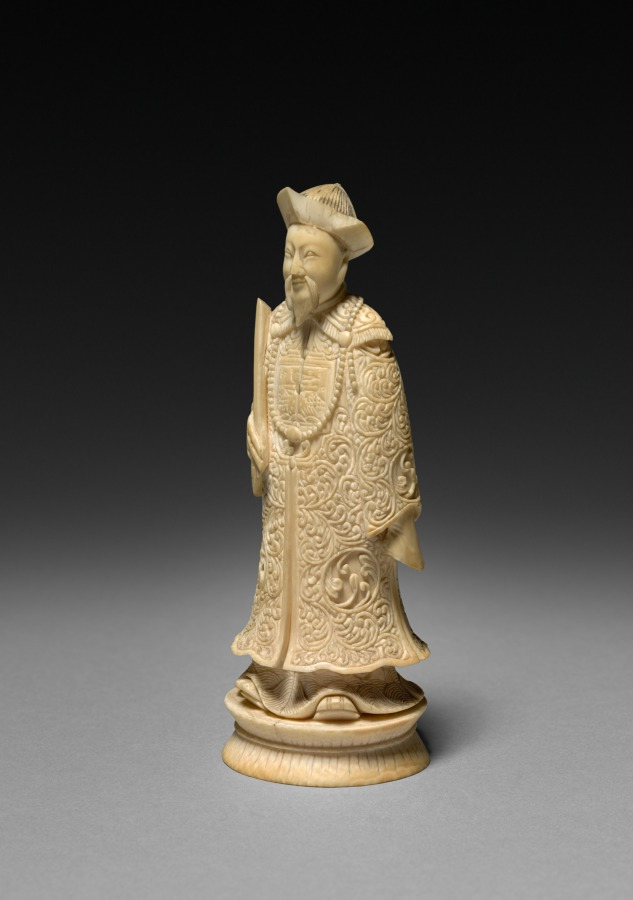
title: Chess Piece: King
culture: Japan, Meiji period (1868–1912)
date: early 1900s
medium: ivory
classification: Ivory